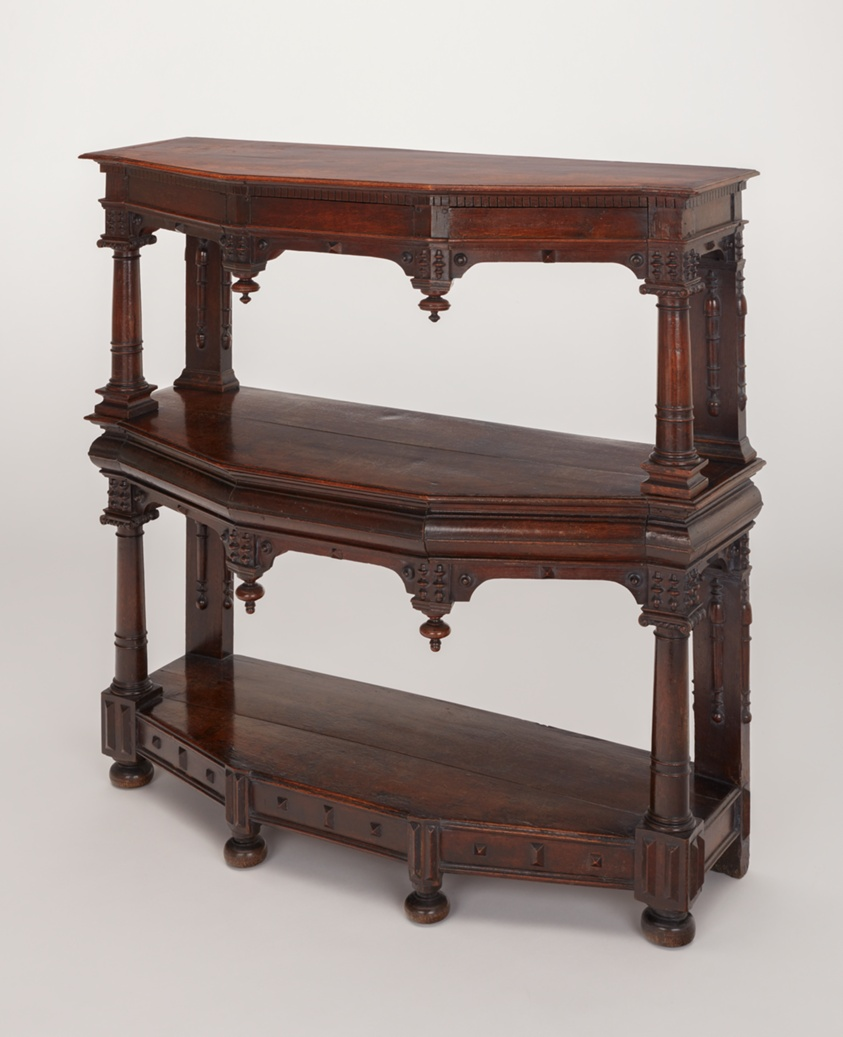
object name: Furniture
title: Court Cupboard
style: Mannerism, 17th Century, Baroque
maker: England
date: c. 1660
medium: Oak and iron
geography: England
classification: furniture; cupboard; decorative arts; european decorative arts; furnishings; Ionic; architectural detail; sideboard (furniture); woodwork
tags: display, banquet, Buffet, cupboard, England, English